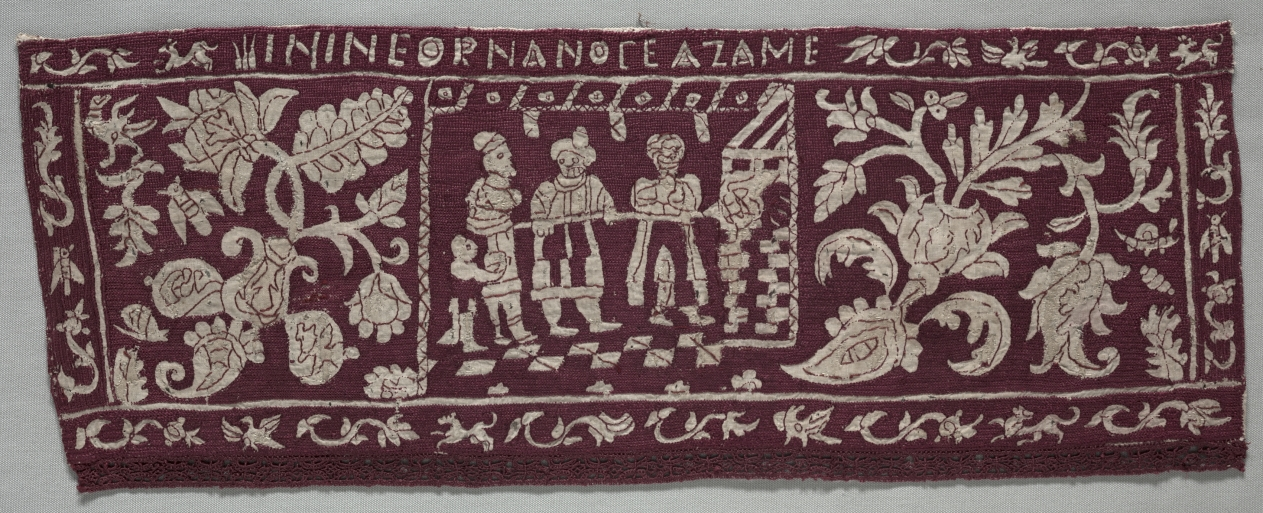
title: Embroidered Border: The Baking of Unleavened Bread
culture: Italy, 16th-17th century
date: 1500s-1600s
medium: Plain weave linen; embroidery in silk; attached border of needle lace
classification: Embroidery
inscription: Embroidered lettering in upper margin: ININEORNANOCEAZAME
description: The border fragments on the left tell the story of the Israelites baking unleavened bread during the first Passover, after which they were delivered out of captivity in Egypt. In the top panel, bakers mix and knead the dough; the bottom panel shows the bakers standing on a tiled floor while placing the bread into a brick oven. This common household scene would have been familiar to Italian audiences during the Renaissance. Two fragments depict events recorded in the book of Exodus. In the top panel, the pharaoh is shown releasing the Israelites after the last plague (1939.355). In the bottom panel, he changes his mind and pursues them across the parted Red Sea, only to be swallowed up after the Israelites safely crossed (1939.352).